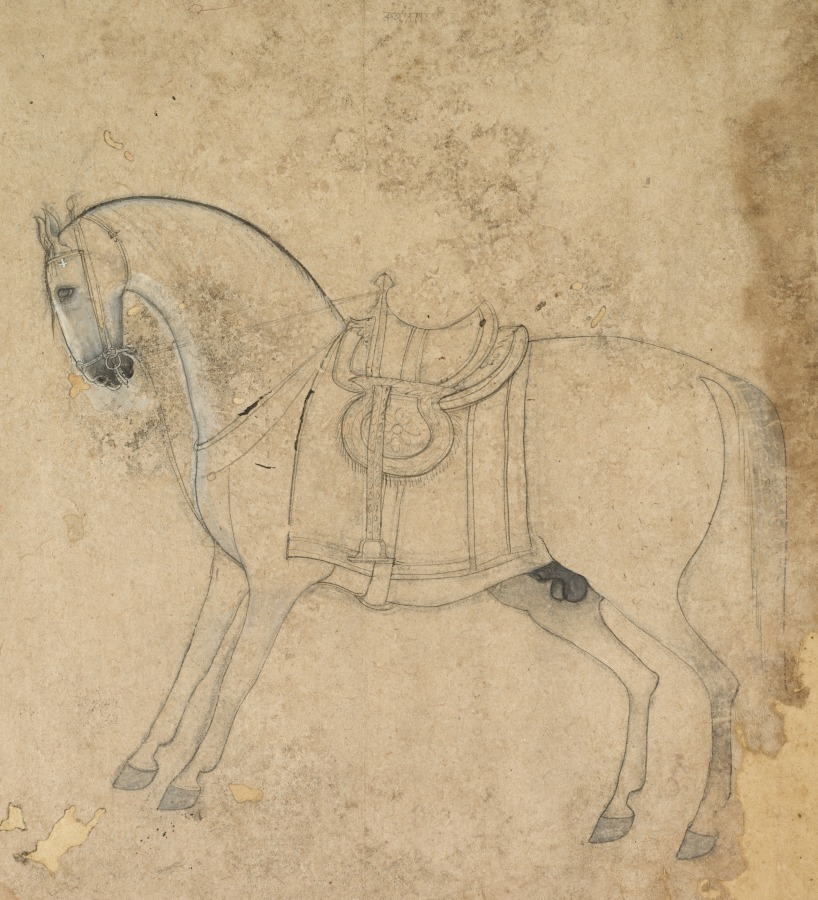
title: A saddled horse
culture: Northern India, Pahari kingdoms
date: c. 1750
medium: Gum tempera on paper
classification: Drawing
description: Horses were important components in royal portraiture, processions, ragamalas (series of images pertaining to verses that correspond to musical systems), and narrative scenes. Pahari artists perfected their ability to depict horses by sketching with brush and black pigment on handmade paper.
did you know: White pigment was used to cover lines that the artist considered to be less than perfect.